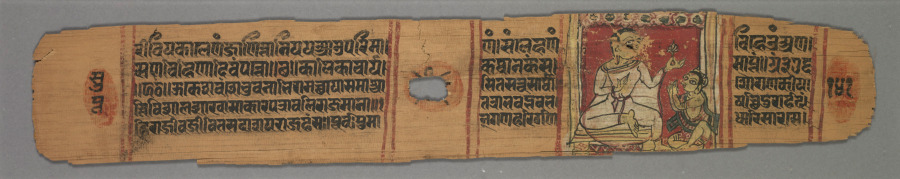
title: Monk Holding a Flower Venerated by a Lay Disciple: Folio 141 (verso), from a Kalpa-sutra and Story of Kalakacharya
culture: Western India, Gujarat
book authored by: Devachandra (Indian)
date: 1287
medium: Gum tempera and ink on palm leaf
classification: Painting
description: Palm leaf was the preferred material for sacred texts before the 1400s in India. The text here was often appended to the Kalpa-sutra, the most sacred book of Jainism. This story concerns the life of a Jain teacher named Kalaka, a prince who developed the ability to work magic after he become a monk, inspired by the teachings of a holy man. The painting on this page shows a monk clad in white, indicating his affiliation with the Shvetambara (“white clad”) branch of Jainism. It is the second to the last page of the manuscript and includes the beginning of the colophon, which contains information about when and where this manuscript was produced.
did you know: The colophon begins on this page; the next page contains the date when the manuscript was written.